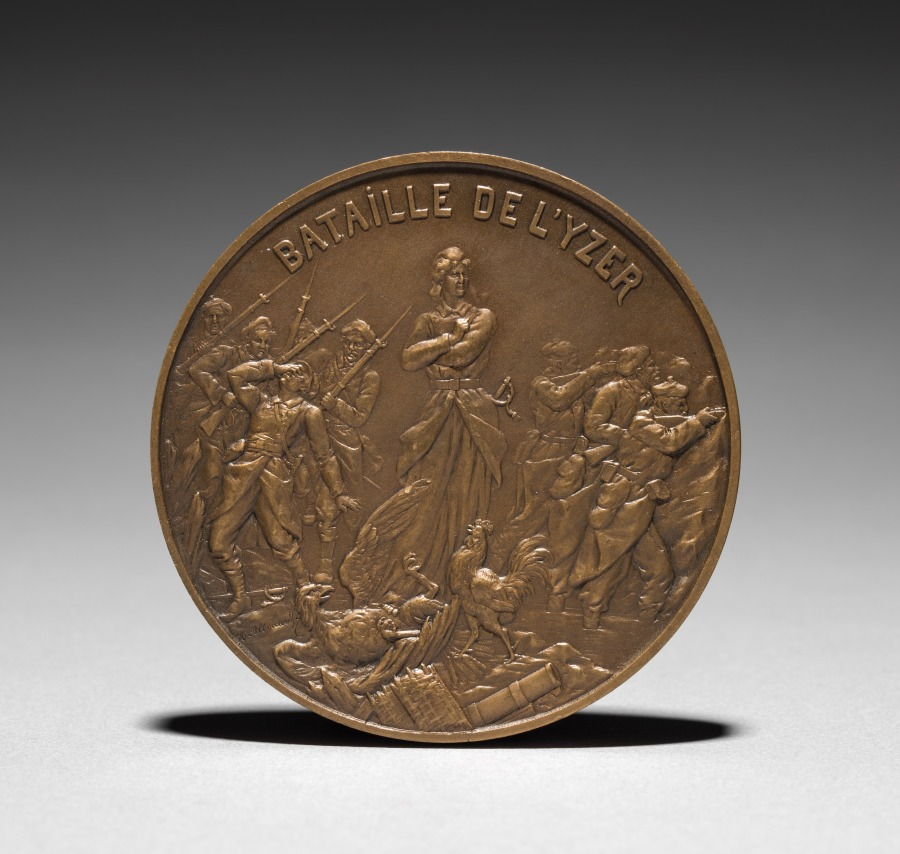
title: Medallion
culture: France, 19th-20th century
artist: Henri Emile Allouard (French, 1844–1929)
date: 1916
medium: bronze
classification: Metalwork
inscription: "Bataille de l'Yzer."